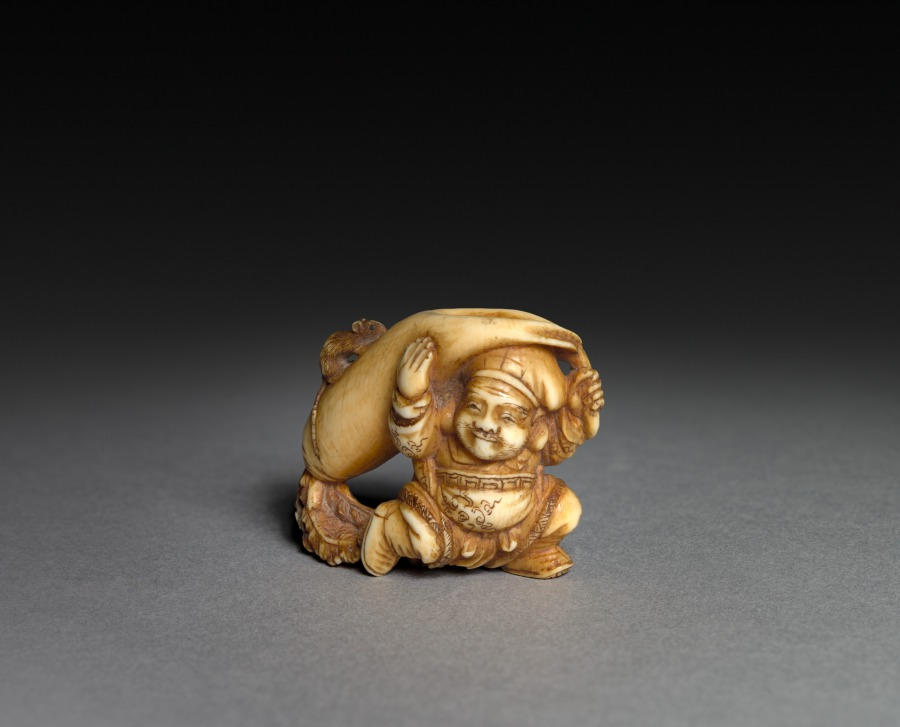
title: Daiitoku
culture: Japan, Edo period (1615–1868)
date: early to mid-1800s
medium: ivory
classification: Netsuke